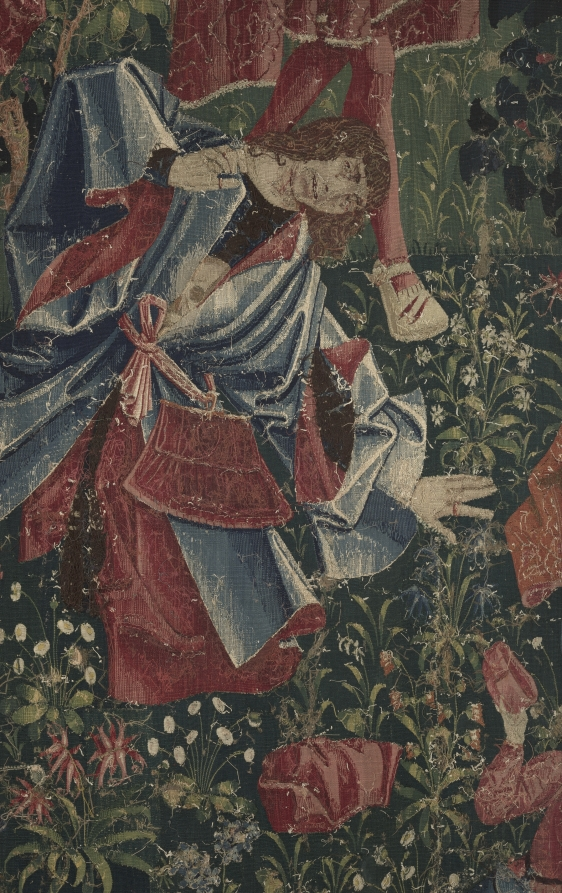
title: Youth (from Chateau de Chaumont set)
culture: France, Lyon(?), early 16th century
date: 1512–15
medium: silk and wool; tapestry weave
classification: Tapestry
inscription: French verse in Gothic letters translates as follows: Youth triumphs while its heart is healthy, And when it seems to hold all in its hand. But this triumph is without eternity. Here one sees the example full well: Those who are happy hide death in thier heart. Let the young heed this warning.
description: Louise of Savoy (1476-1531), queen mother of King Francis I, is depicted here in a sumptuous brocaded velvet in the center. She addresses youthful figures including Éléonore, Pierre Sala’s daughter who is facing her future husband, Hector. On the right, King Louis XII (died 1514) stands in front of the Chateau Langais where he had married Anne of Brittany. Above is Hector’s deceased father with a partially concealed skull under his robe, while a woman expresses surprise at the sight. The verse in Old French at the top states that youthful happiness is not eternal: Youth makes sounds as long as its heart is healthy, And thinks that it holds all in its hand. But this triumph is not eternal. Here you see clearly an example: He that is happy has death in his breast. Of this you people should take note.